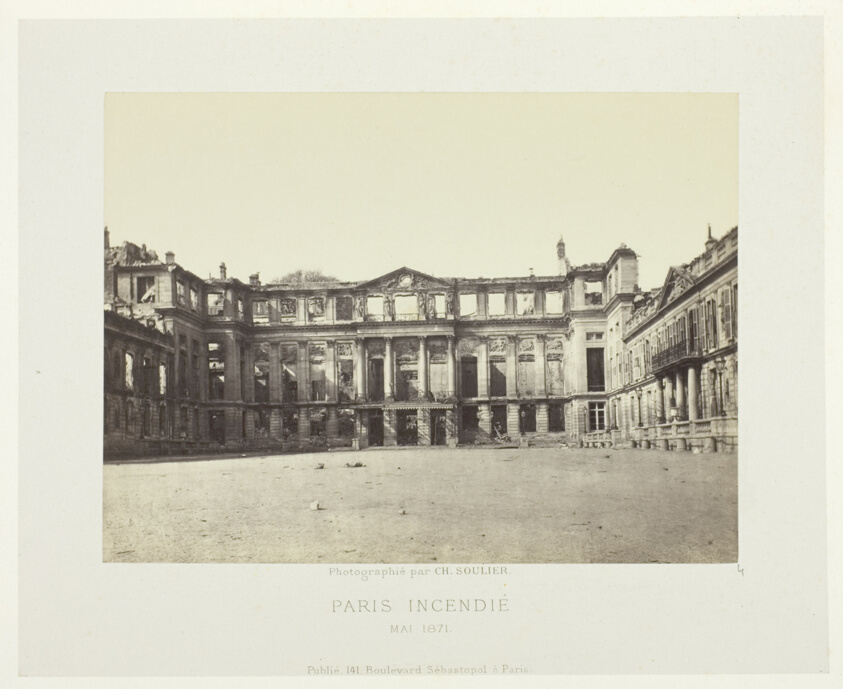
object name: Photograph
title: Paris Fire (Facade of the Palais de Saint-Cloud), from the series "Paris Incendié"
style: 19th century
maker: Charles Soulier (French, 1840–1875)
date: May, 1871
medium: Albumen print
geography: France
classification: gelatin silver (developing-out-paper) pr; photographic process; photography; photograph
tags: Collected by Hugh Edwards, Paris